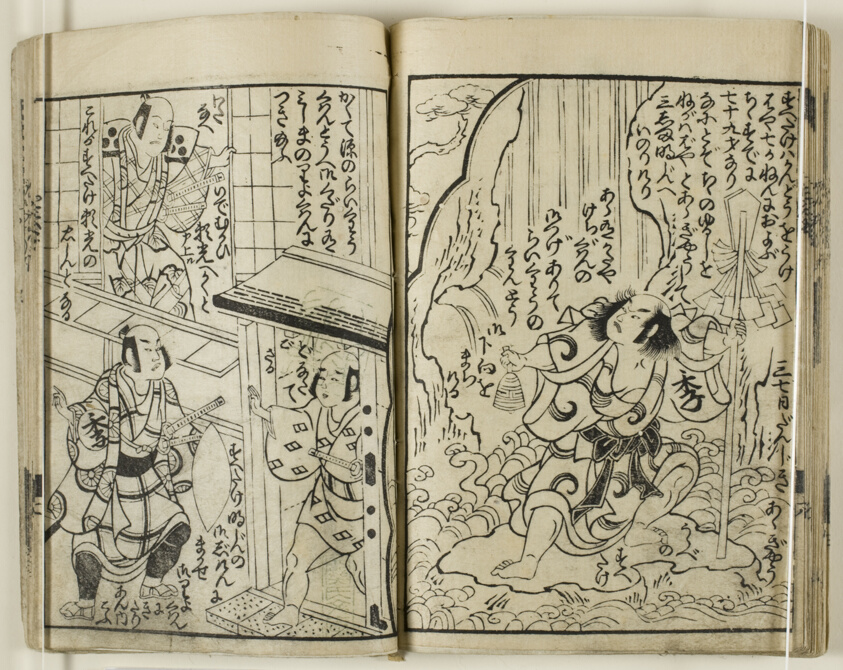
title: Asaina jigoku yaburi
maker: Torii Kiyotsune (active 1757-1779); Japanese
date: 1763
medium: Woodblock printed book, two volumes bound as one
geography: Japan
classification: book; asian art